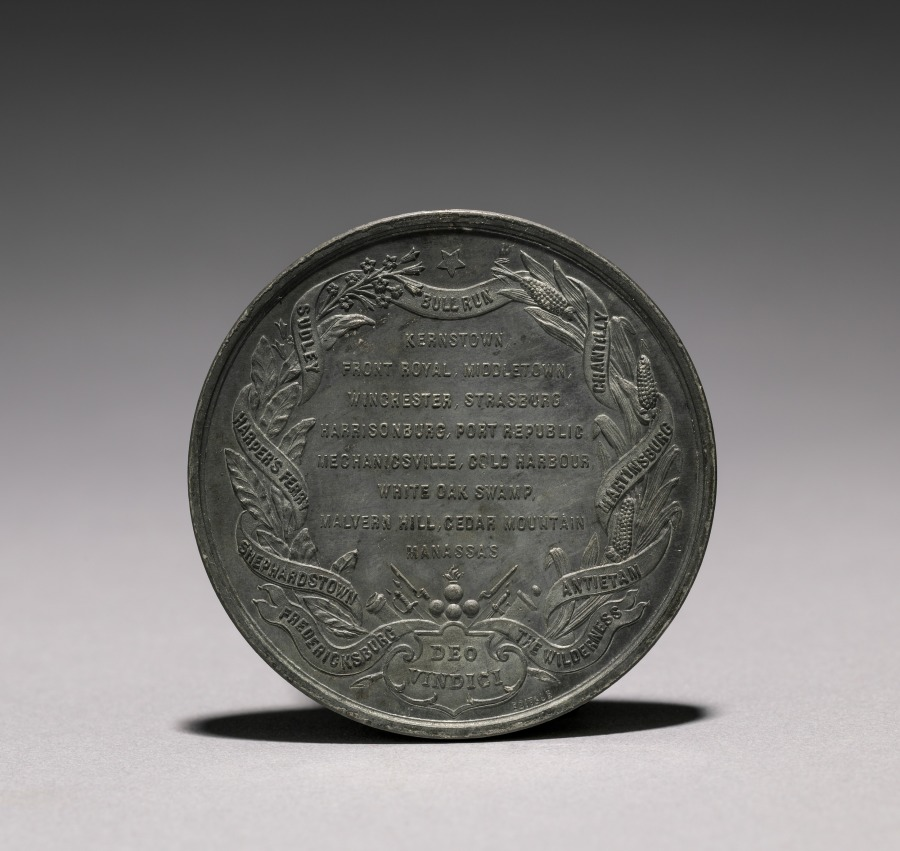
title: Medal: Lieutenant General T. J. Jackson (reverse)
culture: France, 19th century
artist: Armand Auguste Caqué (French, 1793–1881)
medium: bronze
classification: Metalwork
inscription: Bull Run. Kernstown. Front Royal. Middletown. Winchester. Strasburg. Harrisonburg. Port Republic. Mechanicsville. Cold Harbor. White Oak Swamp. Malvern Hill. Cedar Mountain. Manassas. Deo Vindici.